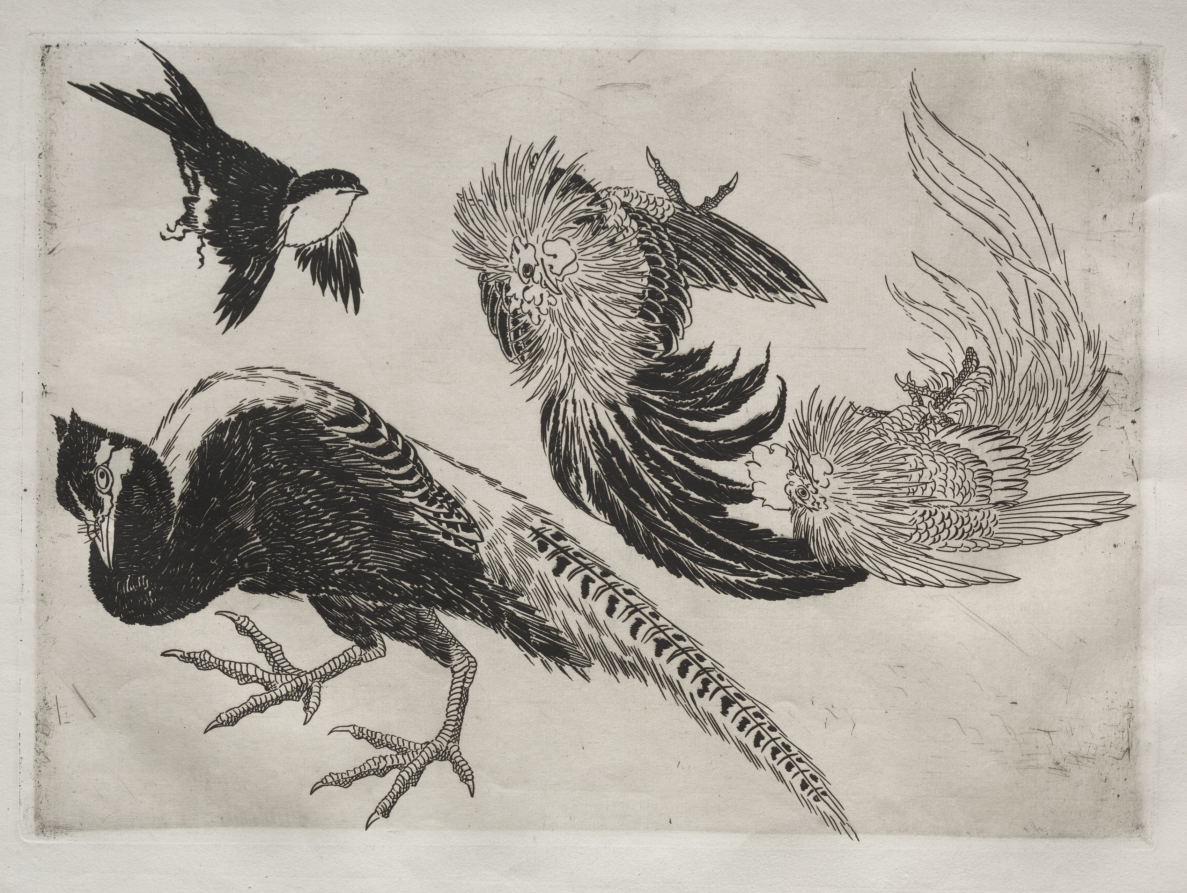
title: Dinner Service (Rousseau service): Pheasants and bird (no. 18)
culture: France, 19th century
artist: Félix Bracquemond (French, 1833–1914)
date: 1866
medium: etching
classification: Print